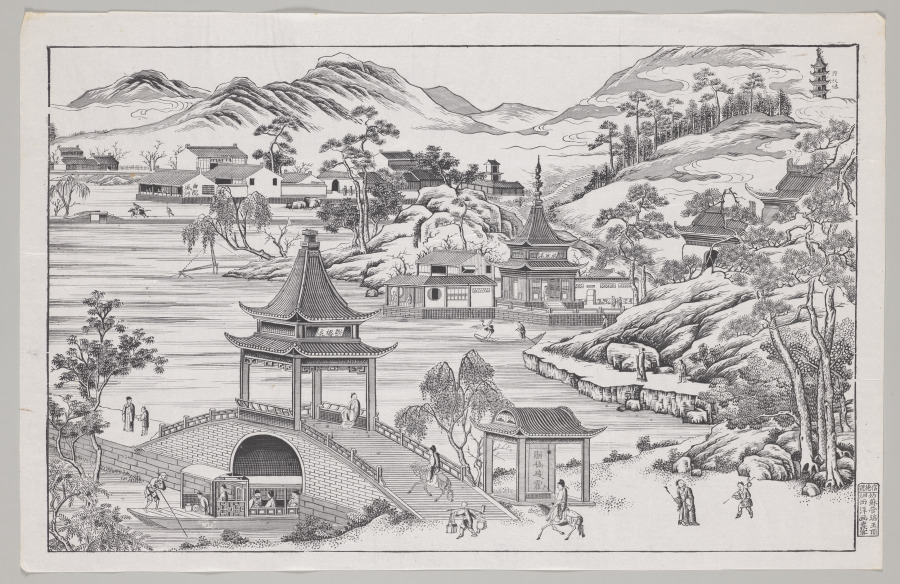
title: Westlake Panorama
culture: China, Qing dynasty (1644–1911), Qianlong reign (1736–95)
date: mid-1700s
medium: One of four woodblock prints; ink on paper; printed with three woodblocks in shades of black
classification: Print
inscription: 信德號 姑蘇管瑞玉頂細西洋畫發客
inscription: The 10 scenes on the four prints are identified by their titles: Print one: 1. Remnant Snow on Broken Bridge (Duanqiao canxue, 斷橋殘雪), 2. Lotus Breeze at Qu Winery (Quyuan fenghe, 曲院風河 [sic]). Print two: 3. Autumn Moon over Placid Lake (Pinghu qiuyue, 平湖秋月), 4. Twin Peaks Piercing the Clouds (Liangfeng chayun, 兩峰插云), 5. Spring Dawn at Su Dike (Sudi chunxiao, 蘇 堤春曉), 11. The emperor’s temporary palace (xinggong, 行宮). Print three: 6. Listening to the Orioles by the Willow Ripples (Liulang wenying, 柳浪 聞鶯), 7. Three Stupas and the Reflecting Moon (Santan yinyue, 三潭印月). Print four: 8. Watching Fish at Flower Cove (Huagang guanyu, 花港觀魚), 9. Sunset at Leifeng Pagoda (Leifeng xizhao, 雷峰夕照). 10. Evening Bell from Nanping Hill (Nanping wanzhong, 南屏晚鍾.) In print two, 11. the emperor’s temporary palace (xinggong 行宮) is also identified.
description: Revived by the southern imperial inspection tours, West Lake imagery became a popular subject during the early Qing dynasty. This panorama is composed of four prints, showing the Ten Scenes of the West Lake in Hangzhou along with other sights. The vanishing point perspective and the hatching lines that depict shading, water, or sky derive from European copperplate prints, introduced by missionaries to China, and were celebrated novelties in 18th-century Suzhou prints. These prints also reached Europe to furnish 18th-century palace interiors.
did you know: Woodblock printing in color reached a height in China in the 1600s to 1700s. The prints were executed by means of sets of separate blocks, each carved to print a different color.